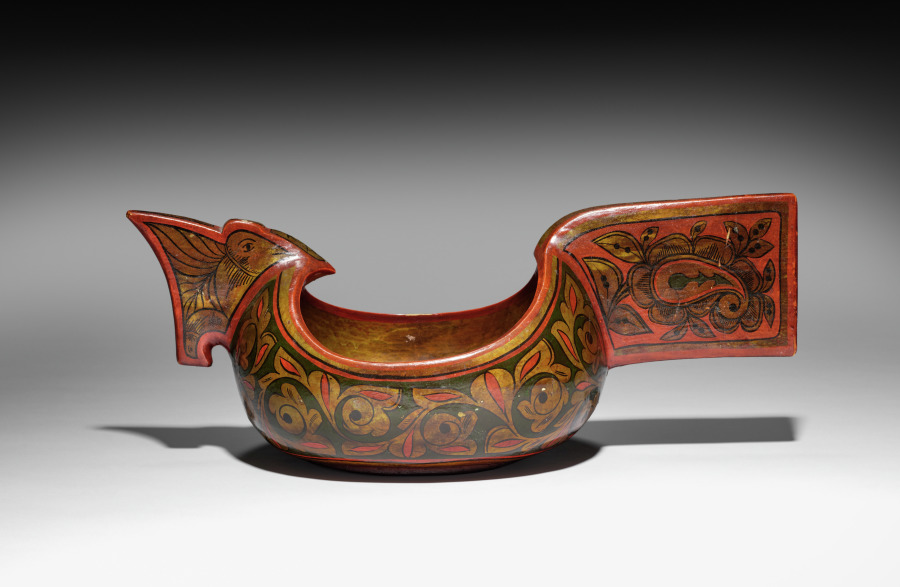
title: Wedding Cup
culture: Russia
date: before 1949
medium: lacquer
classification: Lacquer